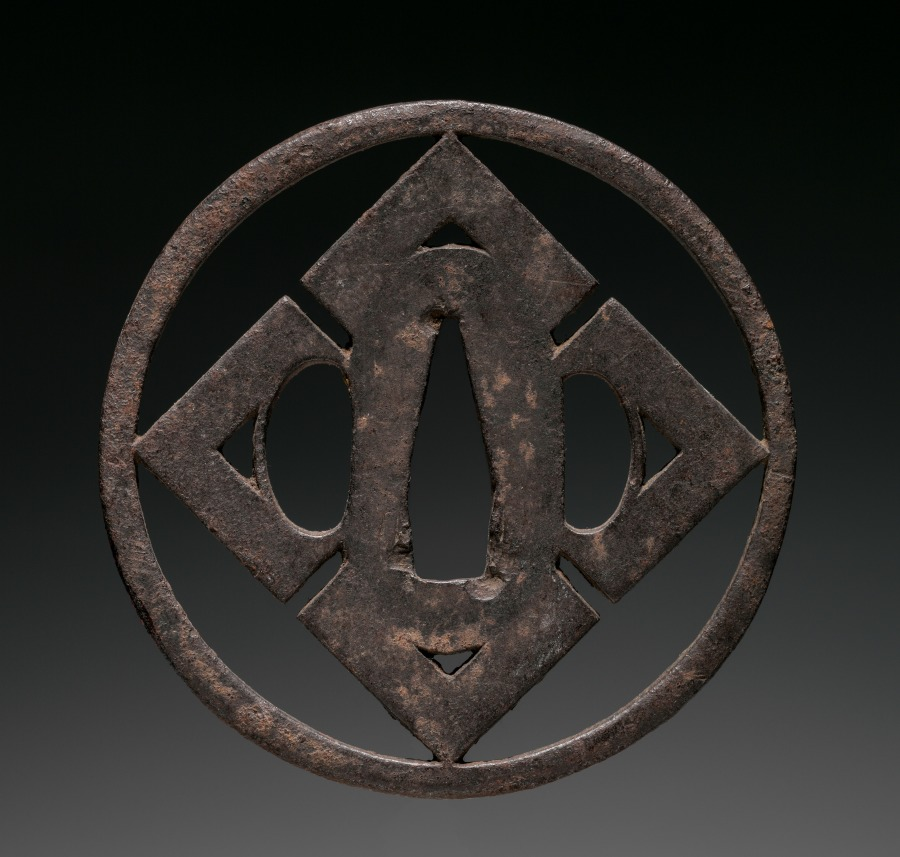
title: Sword Guard (Tsuba)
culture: Japan, Edo period (1615–1868)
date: early to mid-1800s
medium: iron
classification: Arms and Armor